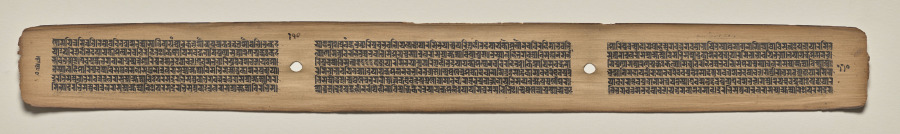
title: Text, Folio 110 (verso), from a Manuscript of the Perfection of Wisdom in Eight Thousand Lines (Ashtasahasrika Prajnaparamita-sutra)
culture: Eastern India, Bihar, Vikramashila Monastery. Painting: Nepal, Kathmandu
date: Sunday, September 14, 1119 (year 239 of the Newar Samvat in the month of Ashvina)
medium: gum tempera and ink on palm leaves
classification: Painting